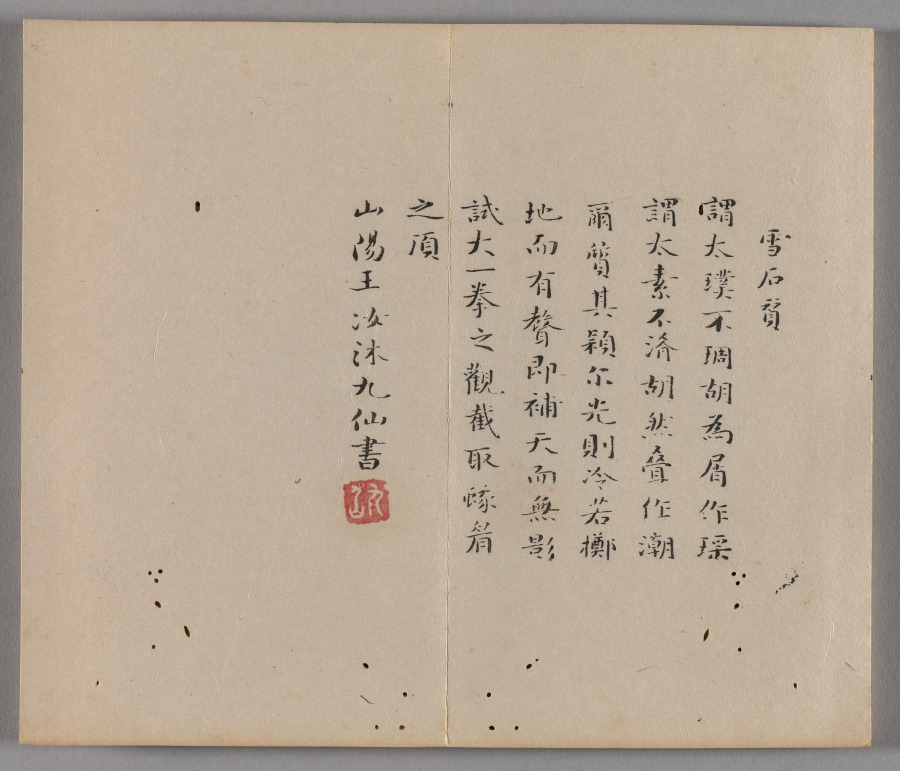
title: Ten Bamboo Studio Painting and Calligraphy Handbook (Shizhuzhai shuhua pu): Rocks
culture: China, Qing dynasty (1644-1911)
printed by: Hu Zhengyan (Chinese, c. 1584–1674)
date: 1633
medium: Woodblock-printed book; ink and colors on paper; first edition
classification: Print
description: Color printing reached a level of perfection in the early 1600s, as seen in this Ten Bamboo Studio Collection of Calligraphy and Painting and the Mustard Seed Garden Manual of Painting (printed 1679 and 1701). The painterly quality, precision in registering (aligning) the woodblocks, and harmonious colors made them the most successful color print editions in Chinese history. Both editions were printed and compiled in Nanjing, spread nationwide, and had a great impact on the arts in Japan and Korea.